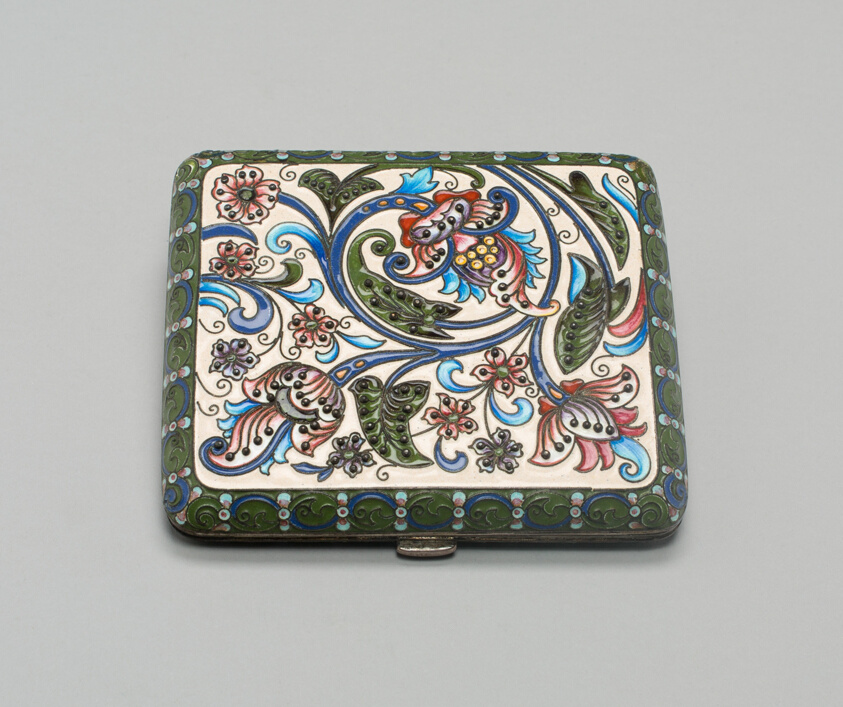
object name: Metalwork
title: Cigarette Case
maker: Peter Carl Fabergé; Moscow, Russia, 1846-1920; Master Craftsman: Fador Ruekert, 19th century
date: c. 1896/1900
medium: Silver, silve gilt, and enamel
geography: Moscow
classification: silver; metalwork; european decorative arts